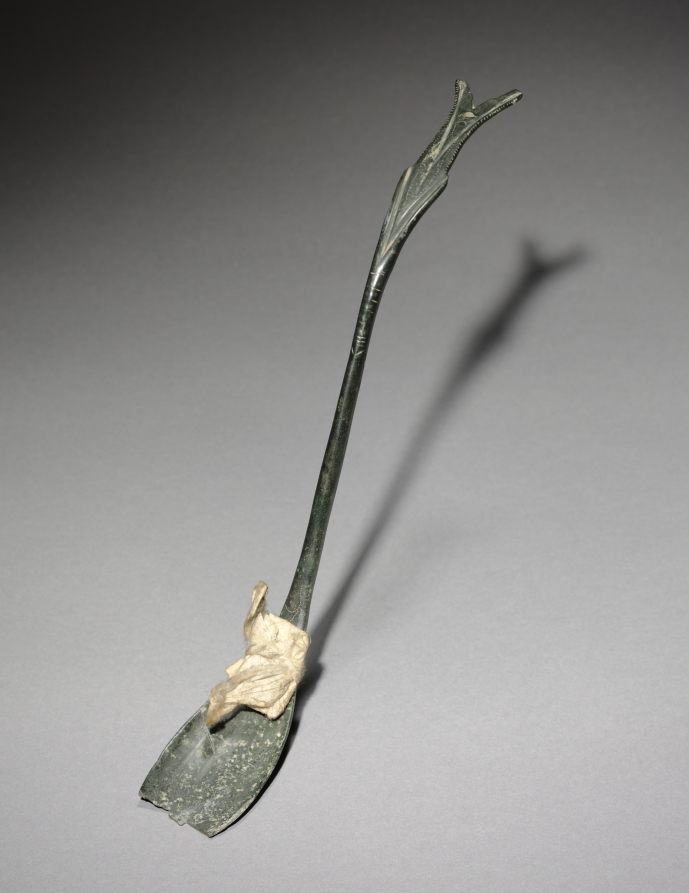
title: Spoon with Fish-Tail Design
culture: Korea, Goryeo dynasty (918–1392)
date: 918–1392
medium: bronze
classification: Metalwork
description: Many of Goryeo period spoons like this one feature a curved handle that splits into a jagged fishtail design. This fishtail design is not unique to Korea; it was also widely used in the area under the rule of two non-Han Chinese states: Liao (907–1125) and Jin (1115–1234). These seemingly ordinary objects testify to exciting material interactions between the Goryeo dynasty and non-Han Chinese northern states, which were often omitted from the official records.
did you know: Bronze spoons are the most common burial item. Scholars have proposed that toward the end of the 14th century, Koreans enjoyed meat-based soups more than any other dishes, explaining why spoons became common household items as well as burial goods.